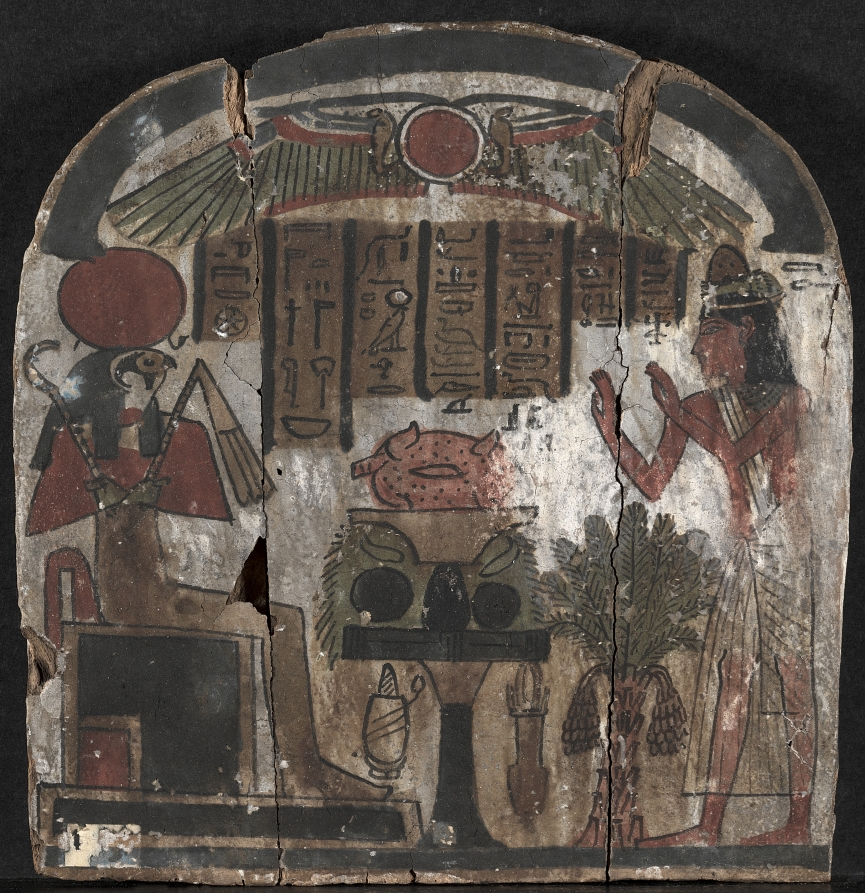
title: Stele of Djedasetiufankh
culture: Egypt, probably Thebes, Third Intermediate (1069–715 BCE), Dynasty 22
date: 945–715 BCE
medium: painted wood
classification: Funerary Equipment